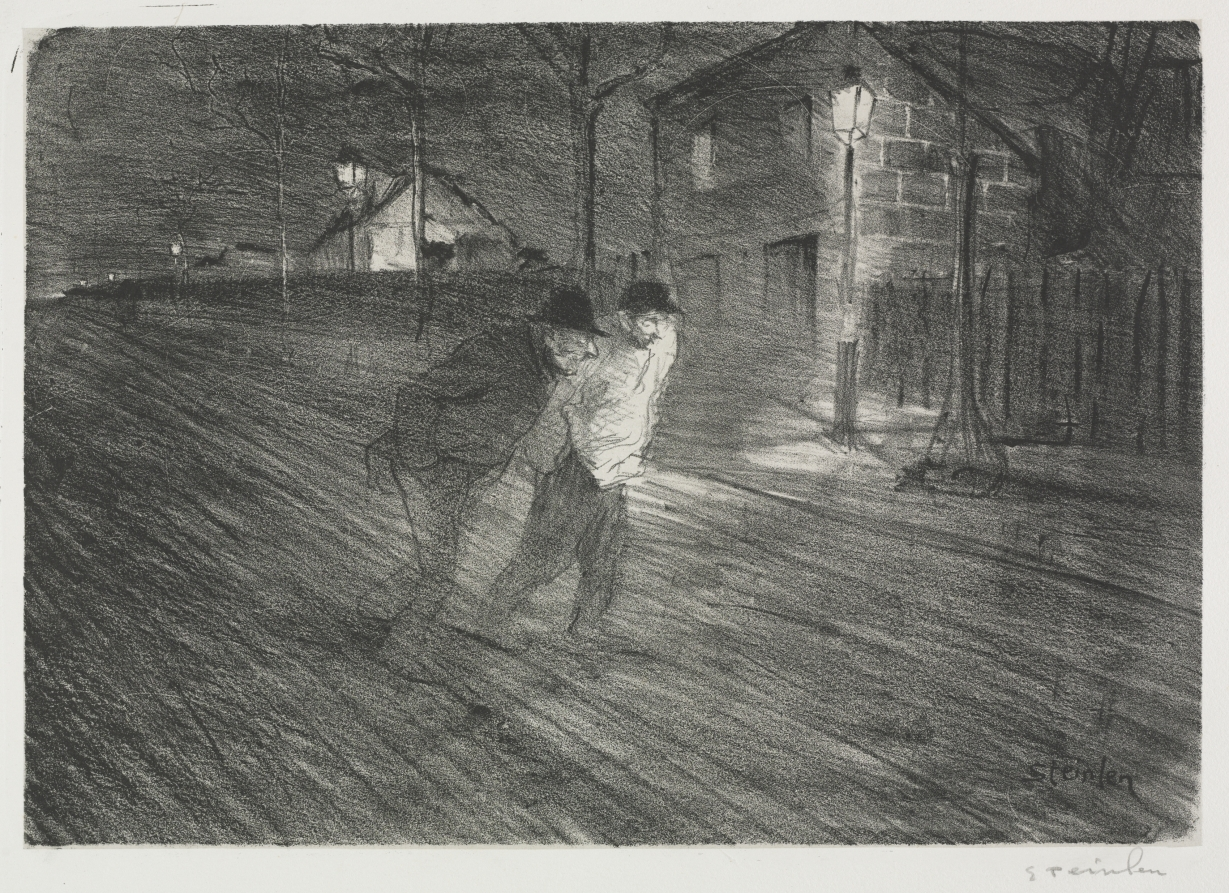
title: La Rue Coulaincourt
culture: Switzerland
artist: Théophile Alexandre Steinlen (Swiss, 1859–1923)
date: 1896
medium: lithograph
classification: Print